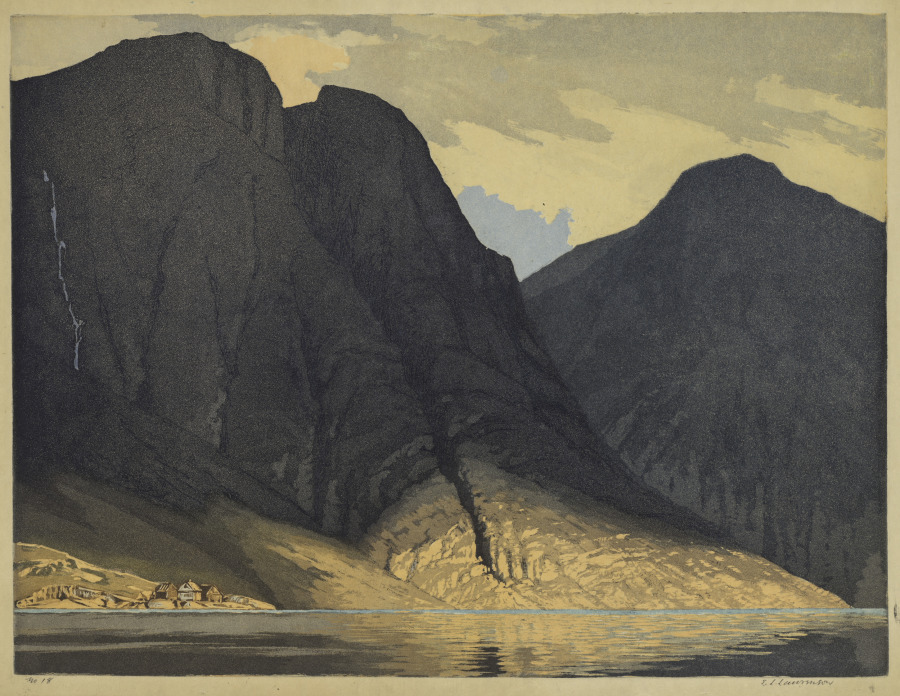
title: [Mountain View with Water]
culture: England, 19th-20th century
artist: Edward Louis Laurenson (British, 1868–1940)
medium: color aquatint with roulette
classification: Print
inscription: Inscribed lower left: no. 18; signed "E. L. Laurenson" lower right. inscribed lower right corner pencil: "CGL"